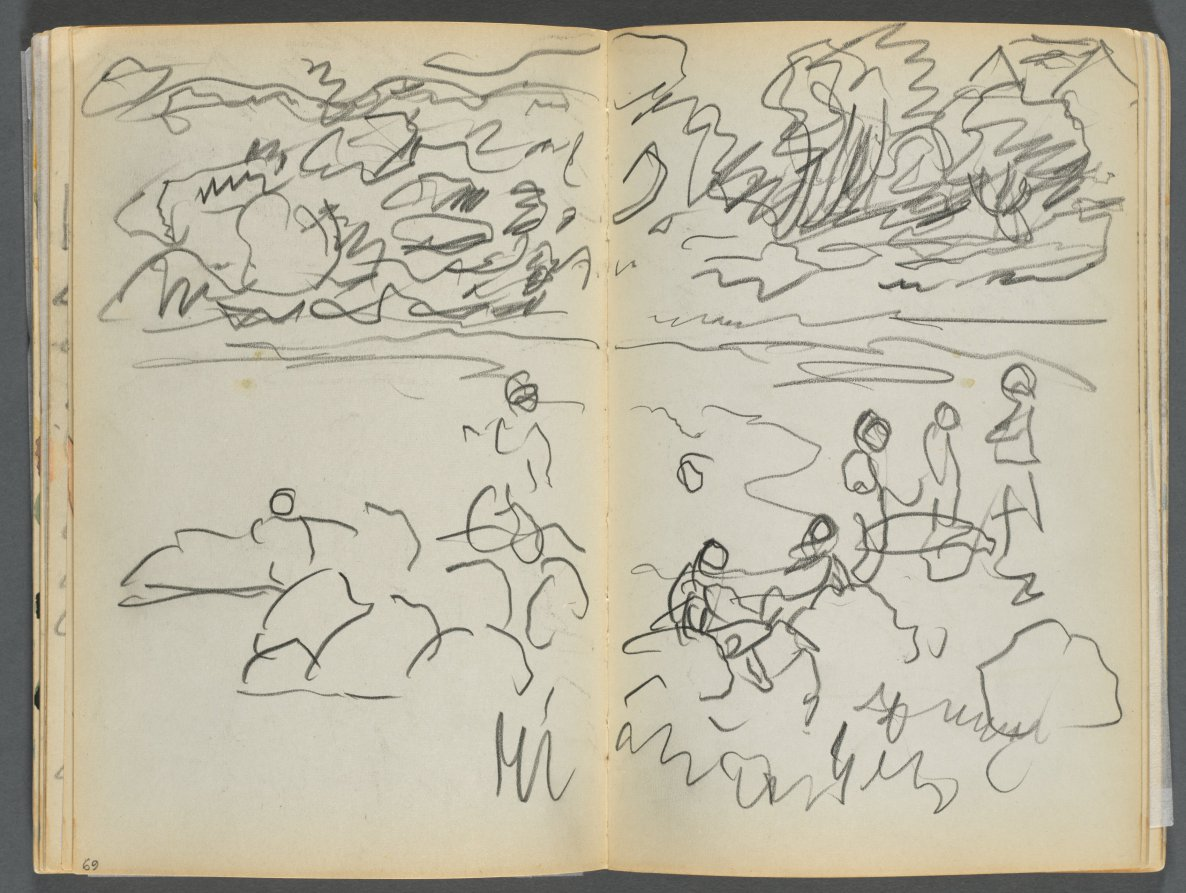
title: Sketchbook- The Granite Shore Hotel, Rockport, page 068 & 69: Beach View with Figures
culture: America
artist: Maurice Prendergast (American, born Newfoundland [now Canada], 1858–1924)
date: 1905–10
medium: graphite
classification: Bound Volume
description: This sketchbook contains 72 pages of pencil drawings and 9 watercolors of Cape Ann. On the inside of the cover Prendergast wrote the address of the Granite Shore Hotel in Rockport, Massachusetts.